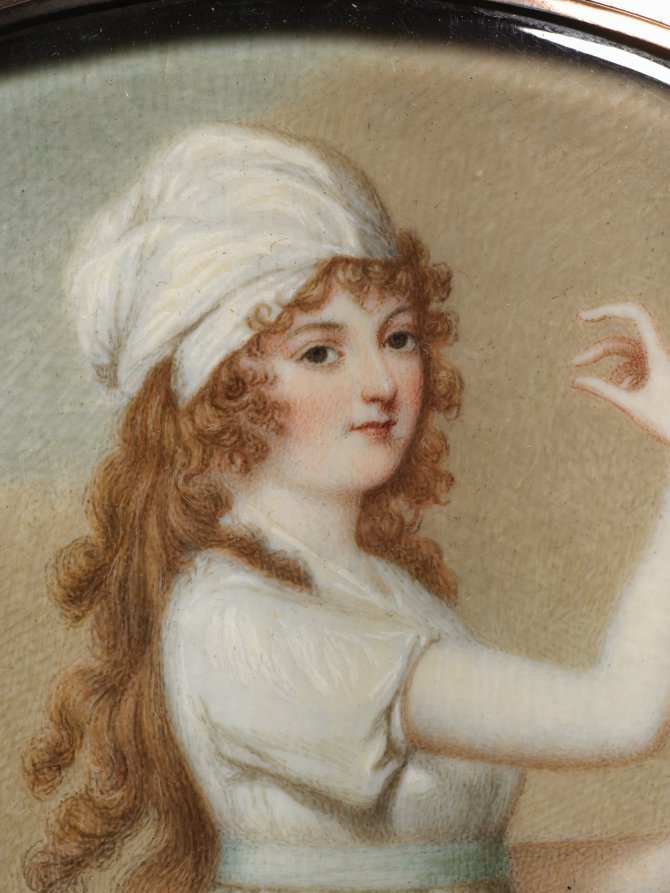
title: Woman with a Tambourine, in Neoclassical Costume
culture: England, 19th century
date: mid to late 19th century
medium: watercolor on ivory in a gold frame with blue glazed reverse and reserve with plaited hair and initials in gold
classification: Portrait Miniature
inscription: annotated lower right: R.C. [initialed on back: JCSB]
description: This large miniature depicts a woman at full length, turned to the left, playing a tambourine held in her left hand. She wears a floor-length, white, Empire-waist gown with short sleeves and scarlet slippers. The Empire silhouette was fashionable in the years around 1800, when it was executed in fine, white cotton or muslin and meant to recall classical Greek or Roman dress. The woman’s light brown hair falls below her waist in curls, and she wears a white turban. She stands on a pale green, closely cropped lawn in front of a low, green, wrought-iron fence with a wood railing. At over 15 centimeters high in its frame, this miniature’s size is incongruous with its oval shape and elaborate glass and braided hair setting, which were typical of late-eighteenth- and early-nineteenth century wearable miniatures a third or quarter of this size. The woman’s face lacks specificity and is probably not a portrait of a particular individual but, rather, a fancy picture exploring themes of beauty and music. This assertion does, however, call into question the presence of the initials and hair on the back of the setting, which customarily indicate an intimate relationship between the owner and the sitter that presumably would be absent outside of portraiture. When this work entered the collection in 1926, it was believed to date from the late eighteenth century, but its size, shape, and the full-length figure make such an early date extremely unlikely. The signature “R. C.” may suggest Richard Cosway (1742–1821), the highly sought-after eighteenth- and nineteenth-century miniaturist; however, this work does not resemble his style. J. H. Wade purchased this object in 1896 for $150—a substantial sum during that period for a miniature—indicating that he may have thought the work was indeed by Cosway. This miniature does relate closely in style and subject matter to the work of the British artist Adam Buck (1759–1833), who was known for his classicizing, full-length watercolor portraits and fancy pictures, after which this work may be a copy. Buck’s miniatures on ivory are bust length and more strongly delineated than this work, which instead recalls the artist’s watercolors. Hallmarks of Buck’s drawings include a low horizon line, muted palette, full-length female figures depicted in profile, and a patchy blue, cloudy sky. A scrolled, wrought-iron fence similar to the one present in this miniature appears in a drawing by Buck. In both cases the fence is used decoratively to break up the expanse of bare space created by the low horizon line and vacant sky. Buck’s works often feature women listening to or playing an instrument, including the tambourine, but he is not known to have painted these full-length figures on ivory. The numerous incompatibilities—including style, subject, composition, medium, setting, size, and signature—together suggest that this object was painted in the second half of the nineteenth century specifically for the art market and to evoke an earlier period.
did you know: On the back the initials JCSB in gold are placed over plaited hair of at least two different colors.